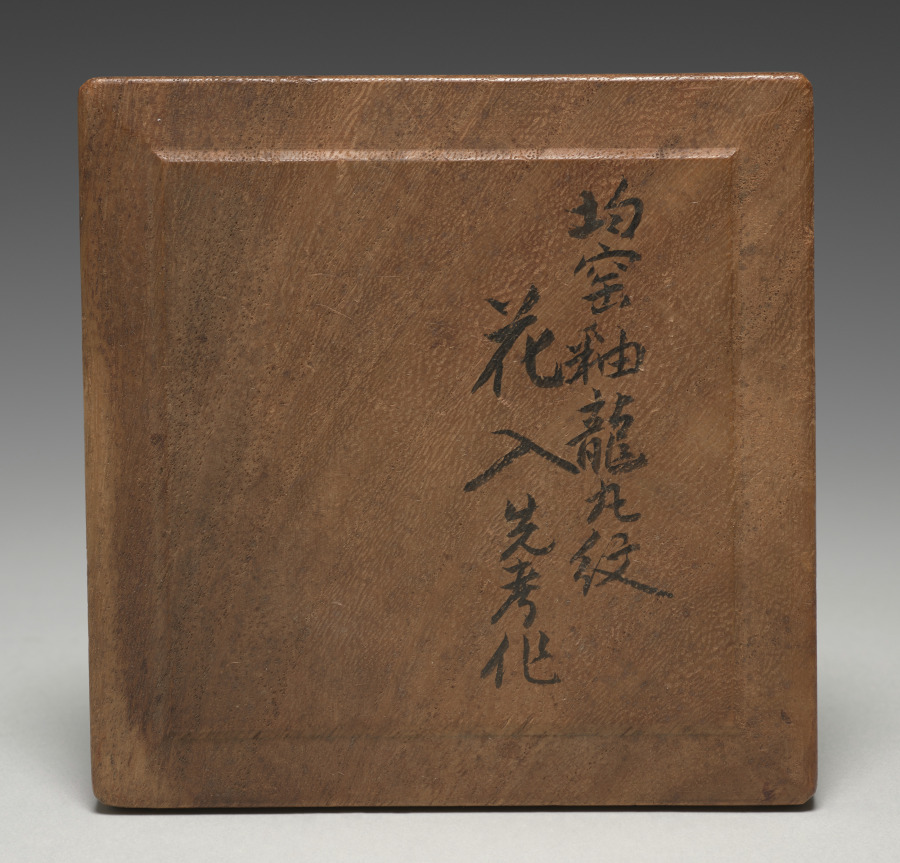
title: Vase with Dragon Roundels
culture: Japan, Meiji period (1868–1912)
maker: Seifū Yohei III (Japanese, 1851–1914)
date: 1900–1914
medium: Porcelain with purple glaze and molded and carved design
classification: Ceramic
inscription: 清風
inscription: 成山清風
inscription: The top of the box lid describes the vase.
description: Each side of this lavender-colored vase is nearly covered with a low-relief design of a four-clawed dragon curled around a flaming jewel. The box lid carries an attestation by Yohei IV that the vase was produced by his predecessor, and the signature on the base is one Yohei III used later in his career. The lid also makes reference to Jun (J. Kin) ware, which was made in numerous kilns in what is now Yuzhou or Yuxian in Henan Province, China, during the Northern Song dynasty. Some Jun wares had an opalescent purple glaze, which was clearly the inspiration for the color seen on this vase.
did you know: Kyoto-based Japanese ceramist Seifū Yohei III (1851–1914) admired the glaze colors found on Chinese porcelain and tried to replicate them through intensive experimentation.